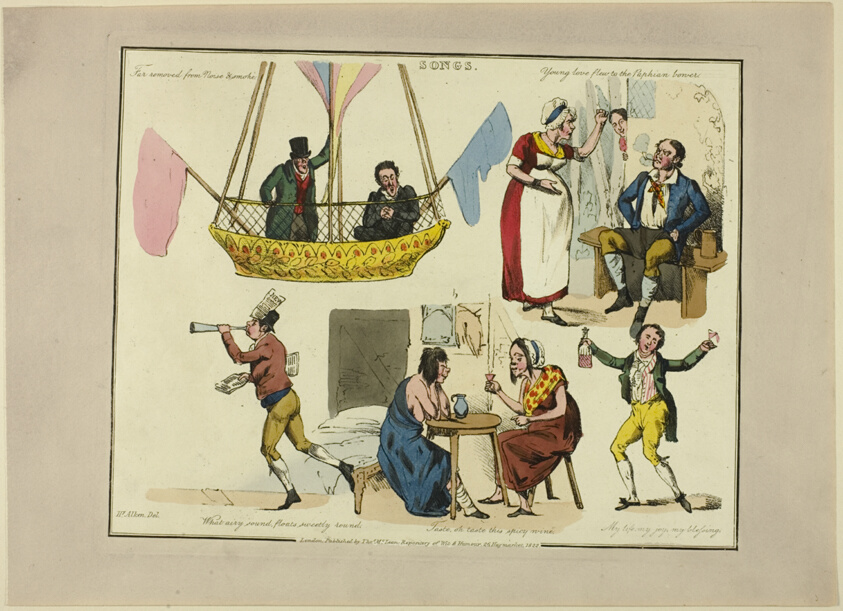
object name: Print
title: Plate from Illustrations to Popular Songs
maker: Henry Alken (English, 1785-1851); published by Thomas McLean (English, active 1790-1860)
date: 1822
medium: Soft ground etching with hand-coloring and aquatint on paper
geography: England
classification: etching; print; prints and drawing